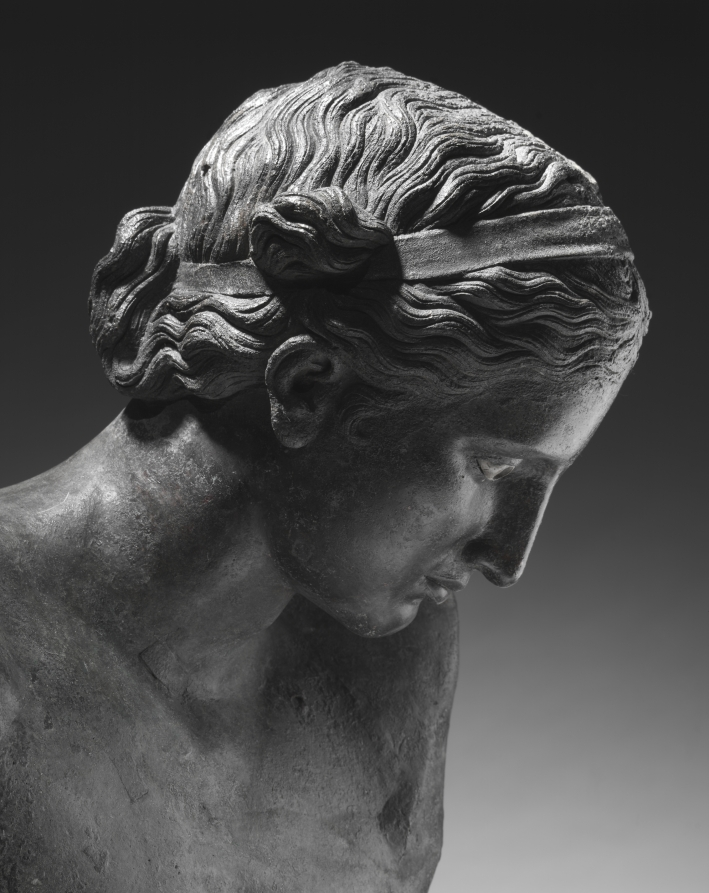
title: The Cleveland Apollo: Apollo Sauroktonos (Lizard-Slayer) or Apollo the Python-Slayer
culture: Greece, Athens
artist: attributed to Praxiteles (Greek, Athenian, c. 400–330 BCE)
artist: or Follower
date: c. 350–200 BCE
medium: bronze, copper, and stone inlay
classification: Sculpture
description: The Cleveland Apollo has been called both Lizard-Slayer (Sauroktonos) and Python-Slayer. The first name comes from the Roman author Pliny the Elder (23–79 CE), who noted in describing bronze works made by the Athenian sculptor Praxiteles (active around 370–330 BCE), “the youthful Apollo [is] known as the Sauroktonos because he is aiming an arrow at a lizard [Greek sauros] which is stealing toward him.” Scholars have long connected this description with artworks showing the young Greek god Apollo in a distinctive pose and hairstyle, standing on his right leg and leaning to his left. In more completely preserved versions, Apollo reaches toward a tree with his left arm and seems to take aim at a lizard. The Cleveland Apollo shows the adolescent god similarly posed and coiffed, making it an important addition to the Apollo Sauroktonos group—the only surviving large-scale bronze sculpture of the type. The young Greek god Apollo, identifiable by his distinctive hairstyle and pose, stands on his right leg and leans to his left, probably toward a now-lost tree. Although now separated, the left forearm and hand survive, together with an unusual lizard-like creature, perhaps drawn from the world of myth. A flat bronze base also remains, though it may be a later adaptation. A tree or other support has been lost, probably smaller than in the marble versions. Given its material and very high artistic quality—note the lifelike hair, fingernails, and inlaid copper lips and nipples—more than one scholar has suggested that the Cleveland Apollo could be the very sculpture seen by Pliny. Some have called the sculpture “Python-Slayer,” seeing the oddly shaped serpentine creature with asymmetrical legs as the mythical Python killed by Apollo in establishing his sanctuary at Delphi. But technical details may explain some of the asymmetry, and no other specific evidence connects it to Delphi. Most scholars would retain the name Sauroktonos (Lizard-Slayer) for the Cleveland Apollo, even as some debate whether it was made by Praxiteles himself or a later follower.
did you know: The Cleveland Apollo is the only surviving large-scale bronze sculpture of its type, Apollo Sauroktonos (the Lizard-Slayer).